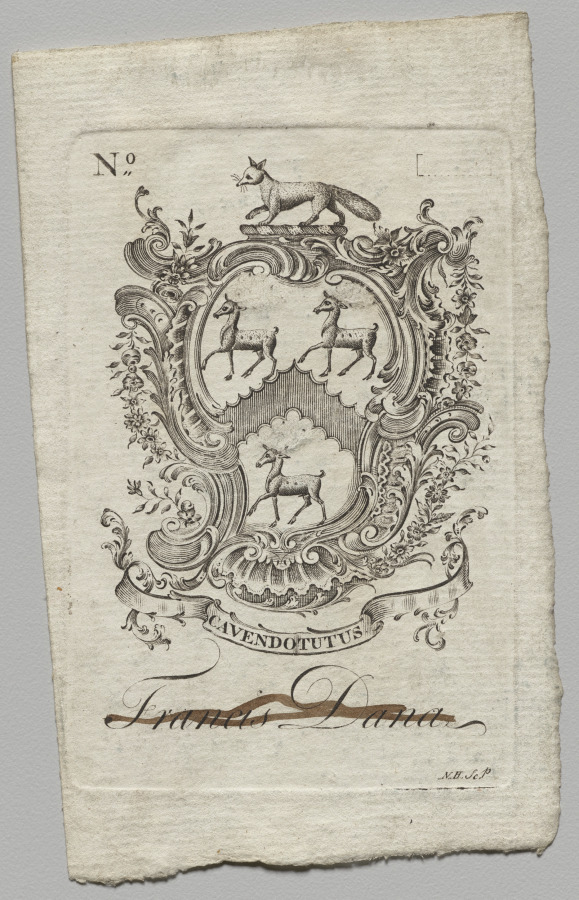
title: Bookplate: Coat of Arms with Francis Dana inscribed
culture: America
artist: Nathaniel Hurd (American, 1730–1778)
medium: engraving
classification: Print